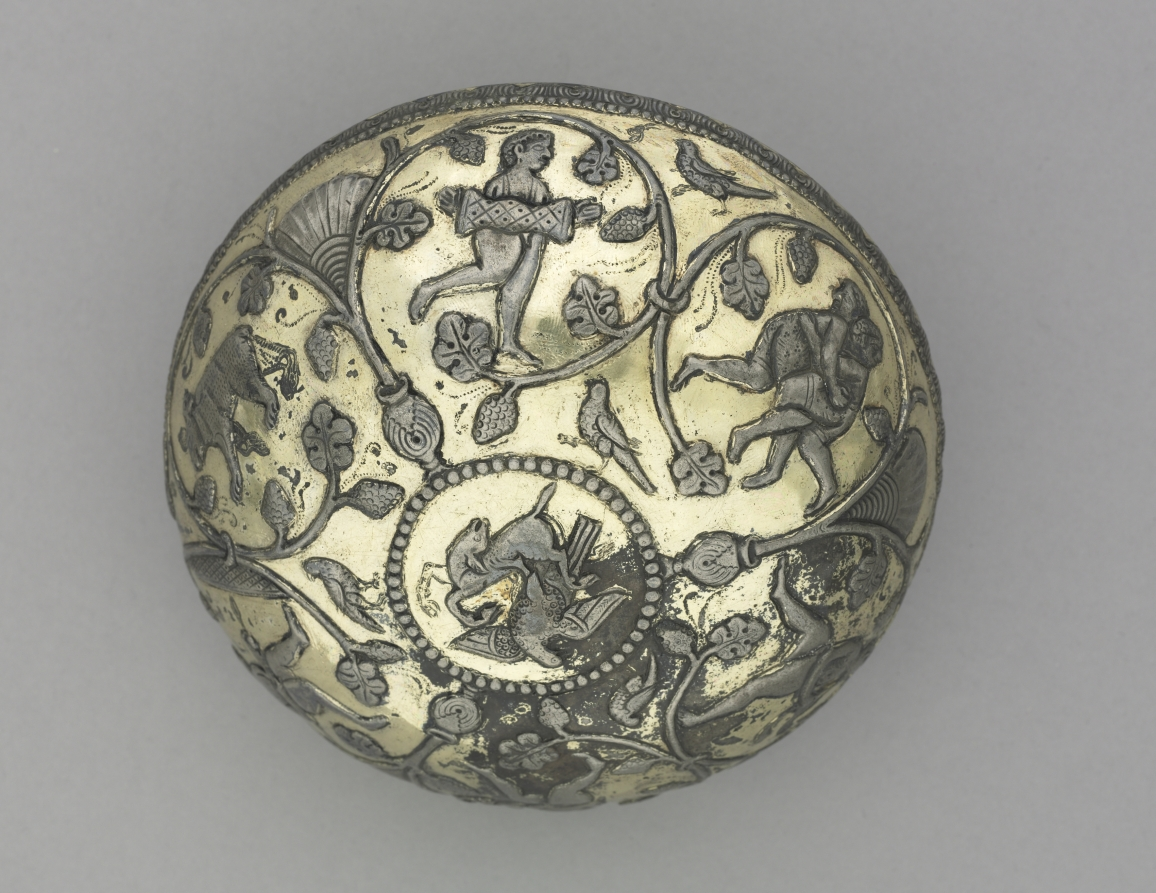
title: Bowl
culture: Iran, Sasanian Empire (224–651 CE)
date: 500–700 CE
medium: silver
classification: Metalwork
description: Every good Zoroastrian was supposed to spend one-third of his day farming; one-third philosophizing; and one-third eating, resting, and at pleasure. The abundance of Sasanian luxury goods is evidence of the importance accorded the last third of the day.